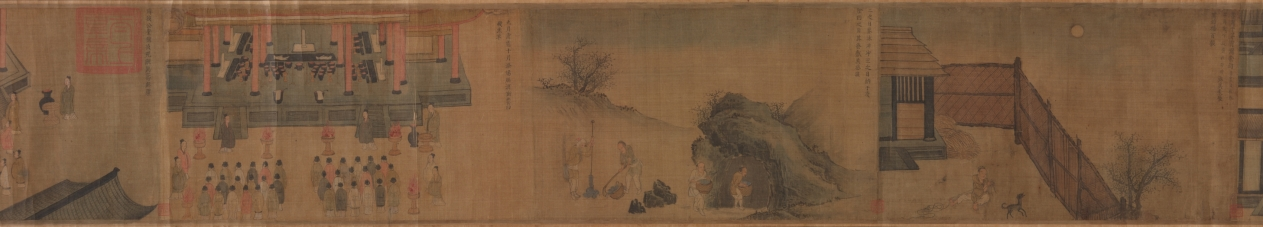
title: "Seventh Month" from the Odes of Bin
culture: China, Southern Song dynasty (1127-1279)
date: 1200s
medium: Handscroll; ink and color on silk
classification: Painting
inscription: Colophons: 1. [on the frontispiece] by the Qianlong emperor (dated 1741). 2. by Lu Wan (dated Zhengde dingchou, 1517). 2. by the Jiaqing emperor (dated 1807).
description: According to Confucian thought, the ruler looks after the well-being of his people which involves agricultural activities. Seventh Month from the ancient Odes of Bin in the Shijing (Book of Poetry) describes occupations throughout the year, including plowing, harvesting, hunting, making clothes, and observing rituals. The earliest illustrations of these Odes accompanied by text were commissioned by Southern Song emperor Gaozong (reigned 1127–1162). As the lower Yangzi delta had become the new seat of government, Gaozong had sets of these illustrations produced by court artists to revive the dynasty and convince the Confucian officialelite of his legitimacy to rule.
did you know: The Odes of Bin appears in the classic Shijing (Book of Poetry), an anthology of more than 300 poems, folk songs, and ceremonial hymns that were originally chanted to music.